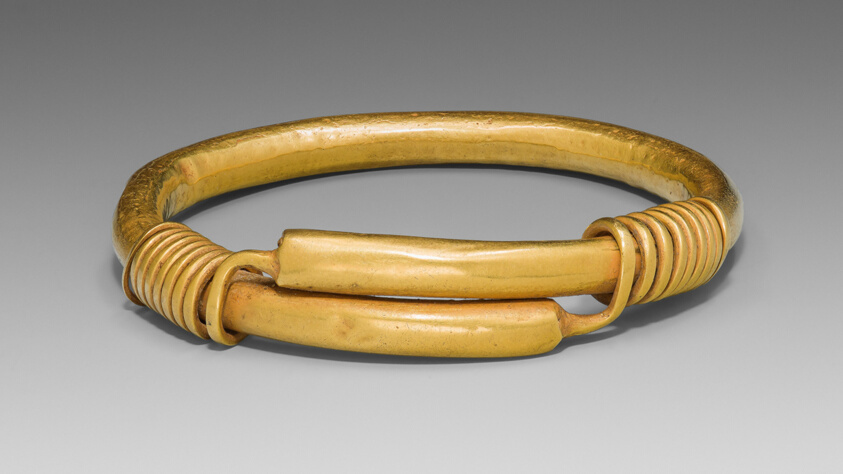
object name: Costume and Accessories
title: Bracelet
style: greco-roman (egyptian), ancient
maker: Roman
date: 1st-3rd century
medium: Gold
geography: Roman Empire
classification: bracelet (jewelry); gold; metal; jewelry; ancient art; costume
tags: beauty, rituals